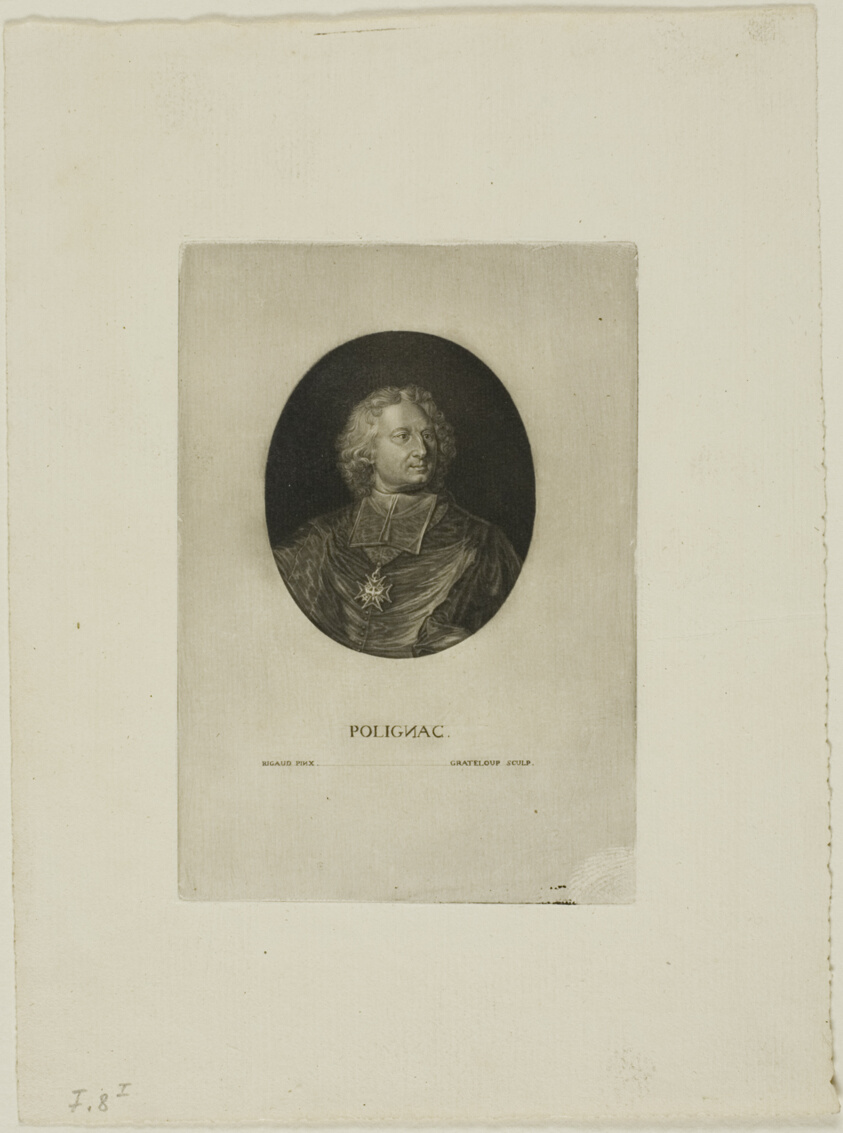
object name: Print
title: Melchior de Polignac, Cardinal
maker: Jean-Baptiste de Grateloup (French, 1735-1817)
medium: Aquatint on paper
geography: France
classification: aquatint; print; prints and drawing